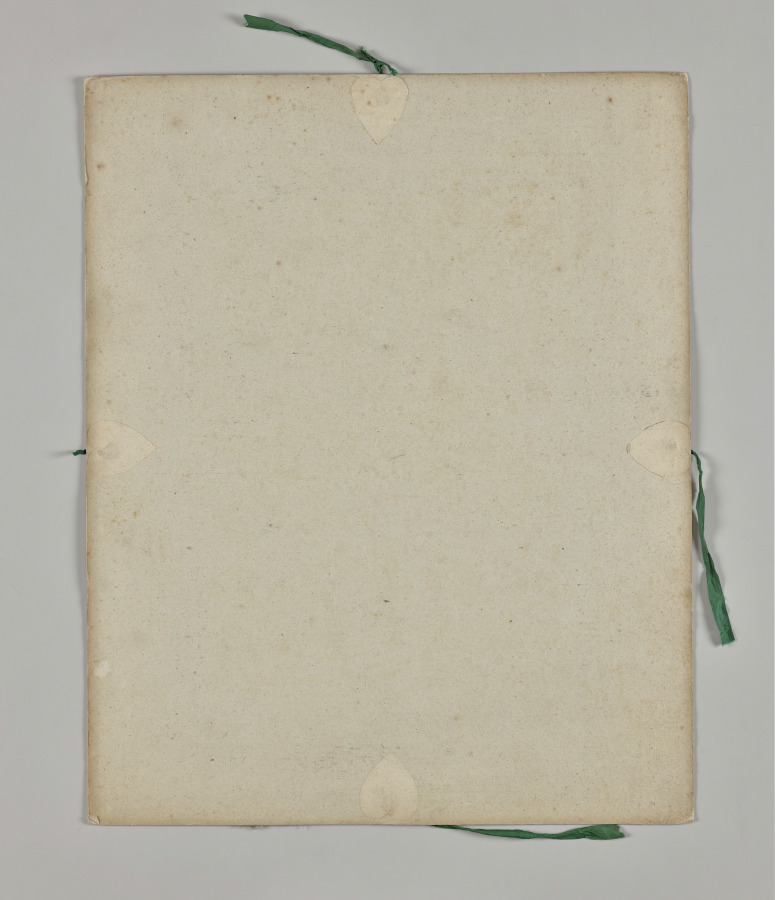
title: Seven Areas from Salzburg and Berchtesgaden. Arranged according to the seven days of the week, connected by two allegorical sheets (Slipcover)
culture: Germany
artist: Ferdinand Olivier (German, 1785–1841)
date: 1818–23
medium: Original slipcase cover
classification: Portfolio